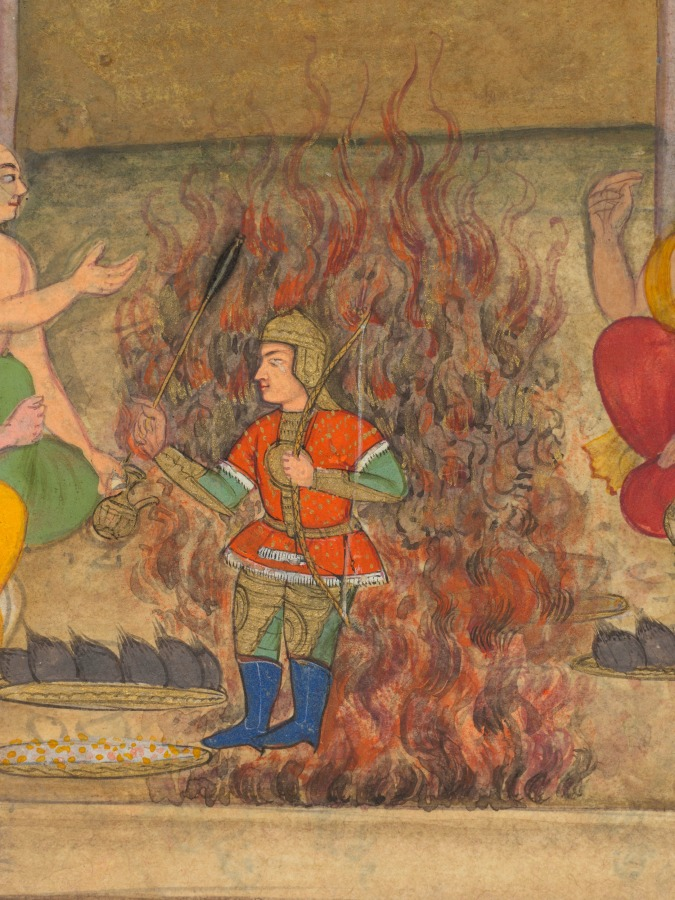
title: Yaja and Upayaja perform a sacrifice for the emergence of Dhrishtadyumna from the fire, from Adi-parva (volume one) of the Razm-nama (Book of Wars) adapted and translated into Persian by Mir Ghiyath al-Din Ali Qazvini, known as Naqib Khan (Persian, d. 1614) from the Sanskrit Mahabharata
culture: Mughal India; made for Abd al-Rahim the Khan Khanan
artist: attributed to Bilal Habshi (probably Ethiopian, active late 1500s)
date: 1598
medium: Gum tempera, ink, and gold on paper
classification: Painting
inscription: Inscriptions around painting: Ascribed to Bilal Habashi (probably Ethiopian, active late 1500s) Mughal court, made for Abd al-Rahim the Khan Khanan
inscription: Persian inscription in bottom margin, in nasta‘liq script: The performing of a sacrifice by King Drupada with Yaja and Upayaja and the appearing of Dhrishtadyumna and Draupadi from the fire; Bilal-i Habashi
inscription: Persian inscription at edge of bottom margin, in nasta‘liq script: and sword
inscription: Calligraphy: Persian text in naskh script: “. . . and rules in Panchala. I want you to take him and bring him to me.” They went to war with Drupada and fought a battle, and King Drupada managed to overcome the Kauravas and put them to flight, but the Pandavas fought him and brought him to Master Drona. Droṇa took half of his [Drupada’s] kingdom from him and left him the other half. King Drupada was extremely distressed that Master Drona had overcome him and wished he could have an offspring who would kill Master Drona. With this desire in his mind, he went to the shores of the Ganges River so that perchance he could find a person whose prayers on his behalf to the almighty God to graciously bestow upon him an offspring capable of killing Droṇa would be accepted. By the banks of the Ganges he saw two pious worshipers. One was called Yaja and the other Upayaja. He spent some time there performing services for them and bringing them whatever they required. After a long while, one day he said to Upayaja: “I would like you to do what is needed so that I have a son who could kill Master Drona. If you do this I will give you one lakh [a hundred thousand] of cows and whatever else you demand.” Upayaja did not accept this. Once again Drupada spent time at their service, and then once again he begged Upayaja to do this. He said: “Go to my elder brother Yaja, since he still has a little attachment to this world, so that he can perform the sacrifice for you, so that the almighty God would bestow on you the offspring that you desire.” King Drupada went therefore to Yaja the brahmin and told him what Upayaja had told him and said: “If you perform the sacrifice for me so that I have son who would kill Master Drona, I would give you eighty thousand cows.” Yaja said, “What kind of a person is Master Drona that you do not deem yourself a match for him?” Drupada said, “Droṇa is the kind of person who remains without rival and peer in the arts of war. His bow is six times the length of the elbow to the fingertip, and nothing in the world can rival and overcome him.” Yaja said: “I will perform the sacrifice for you, so long as my brother Upayaja joins forces with me.” So King Drupada and Yaja both went to Upayaja and pleaded so long that he at last agreed to be present at the sacrifice. They thus made a wish for King Drupada to have a son to kill Droṇa and made a big sacrifice, and from the midst of the sacrificial fire suddenly a son emerged clad in a coat of mail holding a bow in one hand.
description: Fire sacrifice was central to the Indo-European people who entered the Indian subcontinent as early as 1800 BC. Only Brahmins, a social class of priests, had access to the sacred texts called the Vedas, which explained the meaning and process of the fire sacrifice, considered by orthodox Hindus as a way to communicate with the gods. A king named Drupada in ancient India sponsored this fire sacrifice in order to generate a powerful warrior who would be able to slay the enemy who took half his kingdom. Seated around an altar in the sacrificial enclosure, Brahmins pour oblations into the fire and recite the prayers necessary to generate the divine warrior Dhrishtadyumna, shown here in full battle armor at birth. The inscription below gives the title and the name of the artist, Habshi, which means “Ethiopian,” suggesting the presence of Africans in the royal Mughal workshop. The story of how the warrior Dhrishtadyumna was generated from the fire sacrifice is written on this page. When King Drupada lost half his kingdom to a military master named Drona, he needed a gift from the gods to defeat him: a new warrior born to accomplish this mission. In order to obtain this gift, King Drupada went to the banks of the Ganges to find two powerful Brahmins to whom the gods would respond favorably. After serving them faithfully and offering payment of 100,000 cows, the Brahmins Yaja and Upayaja agreed to perform the sacrifice. The text is written in a form of Arabic script, called naskh, in the Persian language, as translated from the original Sanskrit epic Mahabharata for emperor Akbar (r. 1556¬–1605). The passages of dialogue are written diagonally.